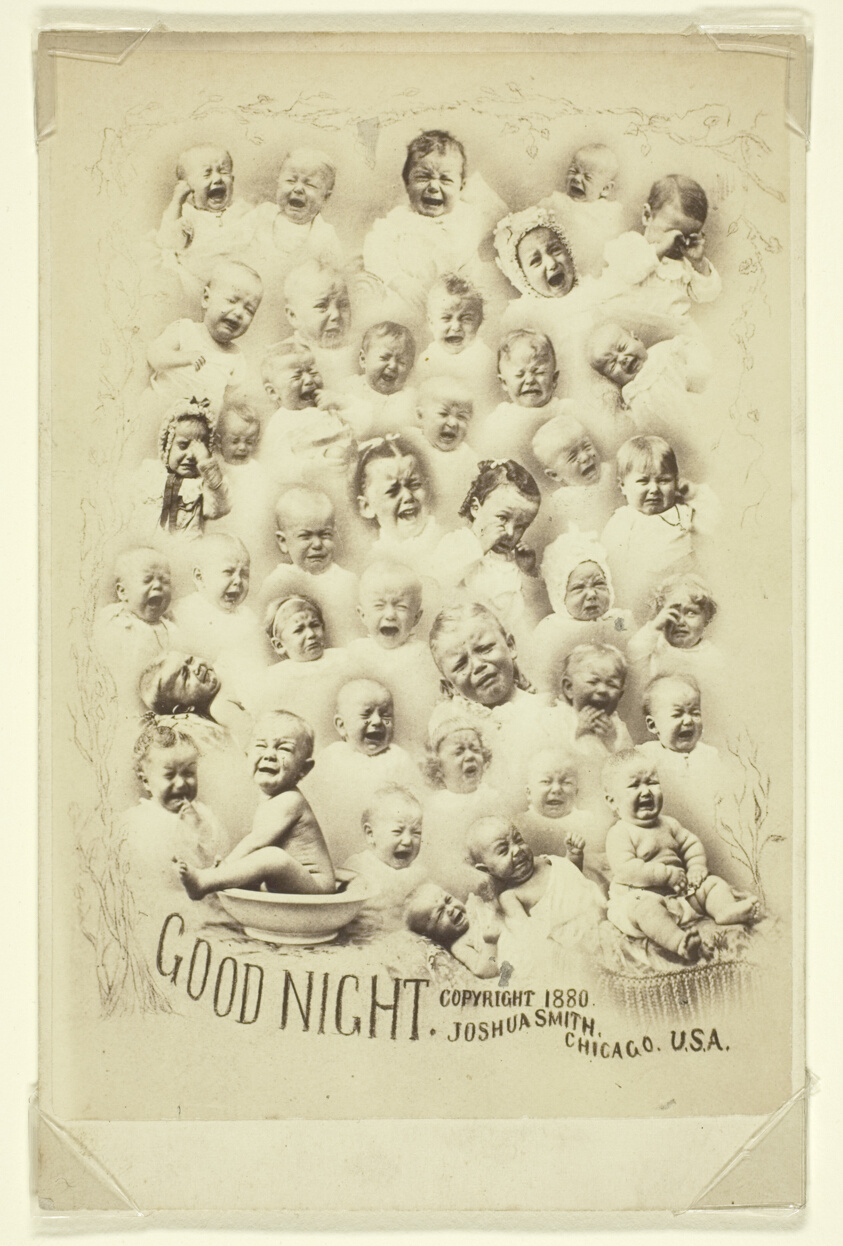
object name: Photograph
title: Good Night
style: 19th century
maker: Joshua Smith (American, active 1860s)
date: c. 1880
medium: Albumen cabinet card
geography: United States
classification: albumen silver print; photographic process; photography; photograph